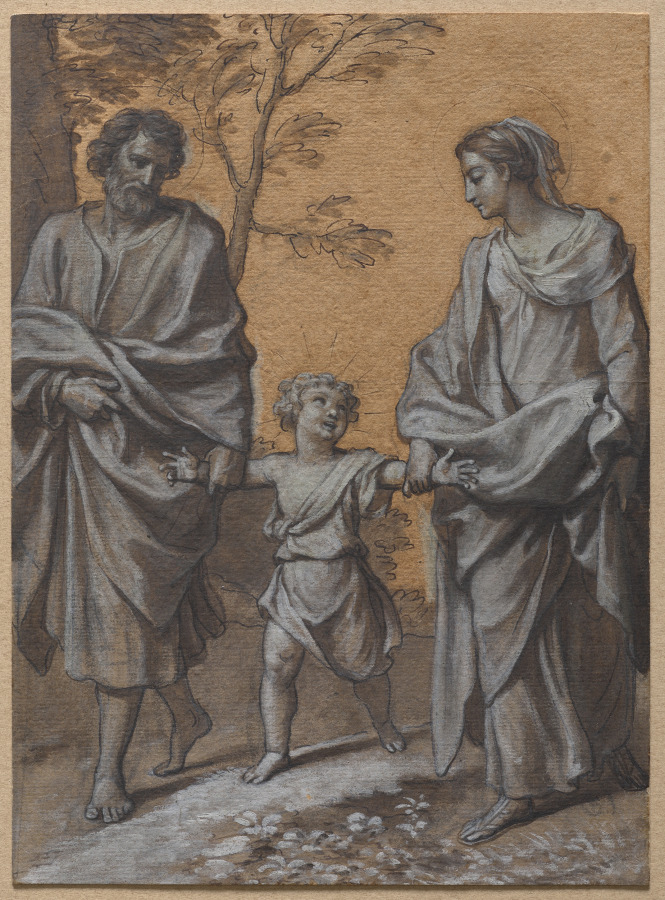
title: The Return of the Holy Family from Egypt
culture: France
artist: Claude Simpol (French, c. 1666–before 1711)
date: c. 1695–1700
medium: pen and black ink, gray opaque watercolor and white heightening on prepared yellow paper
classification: Drawing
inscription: Numbered "no. 2" on verso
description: The iconography of this drawing by the late 17th-century artist Claude Simpol is that of the Holy Family, but the exact subject is harder to identify with certainty. Due to the child’s ambiguous age, the scene is either the return of the Holy Family from the Flight into Egypt, or the return from the temple after Christ appeared among the doctors. Though loving and tender, the serious expressions and air of melancholy foreshadow Christ’s sacrifice, which is implied by the child’s arms held outstretched by his parents as if on a cross. The subtlety of emotion emphasizes the familial connection of the Holy Family and thus Christ’s humanity.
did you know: To make this drawing, the artist employed an unusual combination of materials, consisting of grey and white opaque watercolors and ink on a yellowish prepared paper, which offsets the figures in the scene with a warm glow.